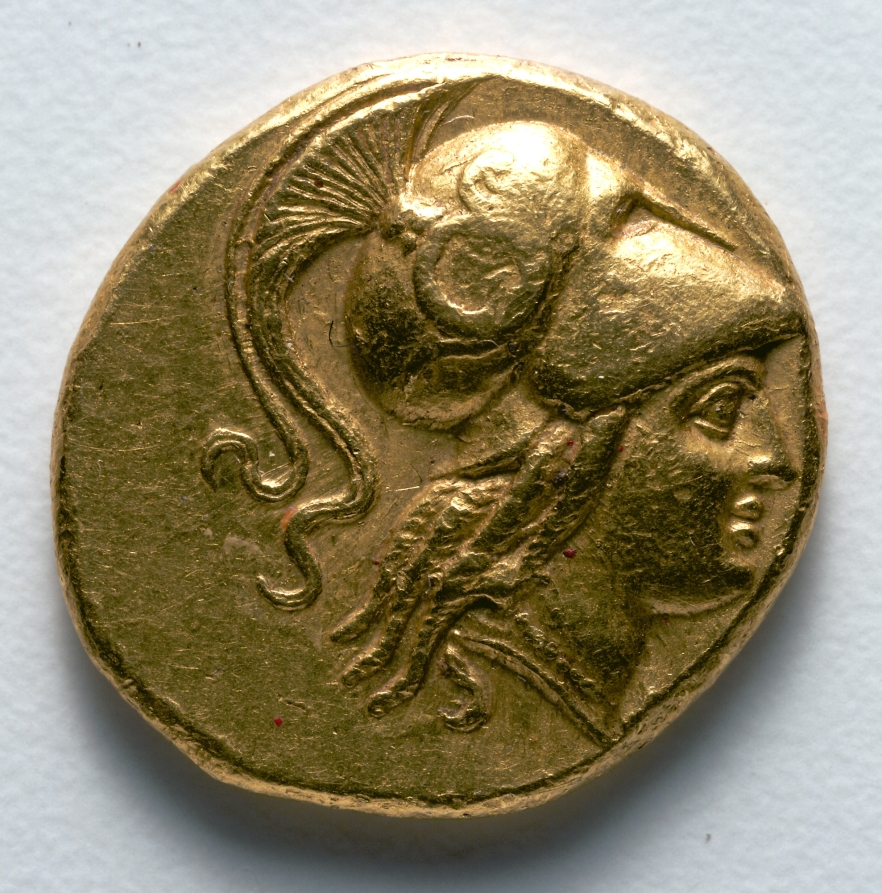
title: Stater: Head of Athena (obverse)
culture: Greek, Macedonian, minted at Salamis (Cyprus)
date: c. 325–275 BCE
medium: gold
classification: Coins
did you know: Athena appears off-center on this coin’s obverse due to an error in the minting process.